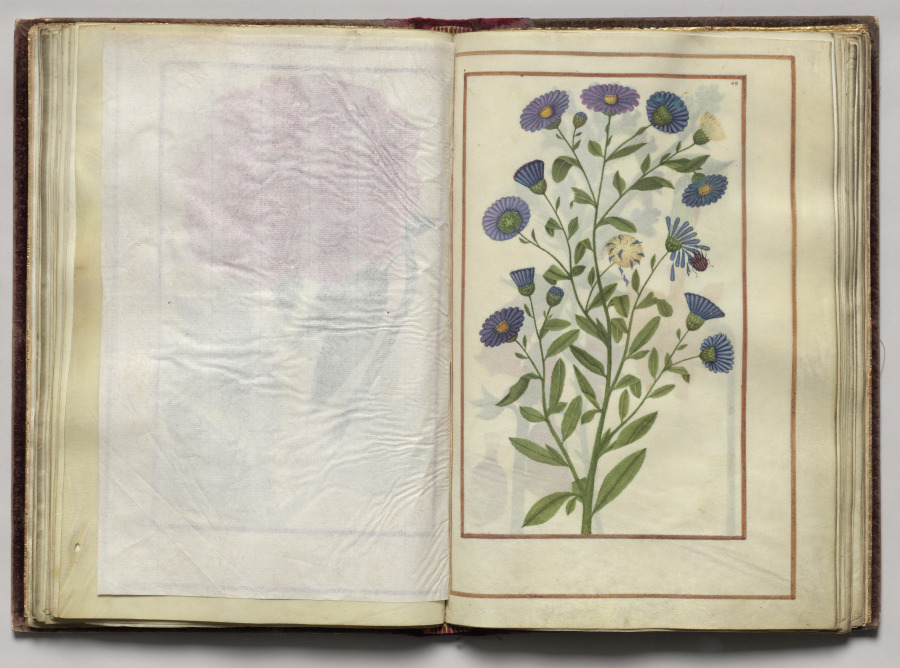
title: Florilegium (A Book of Flower Studies)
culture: France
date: 1608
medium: bound manuscript of 48 leaves, 77 drawings; watercolor, ink, silver, and gold over occasional traces of pencil, on vellum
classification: Bound Volume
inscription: Dated: Poitiers 1608 (on frontispiece) Signed: On frontispiece in black ink, lower right: Van Kuyk Notation on drawing: Frontispiece: in pencil, lower margin: * élève de Van Kessel, peintre flammand (* in pencil also appears in front of Van Kuyk's name).